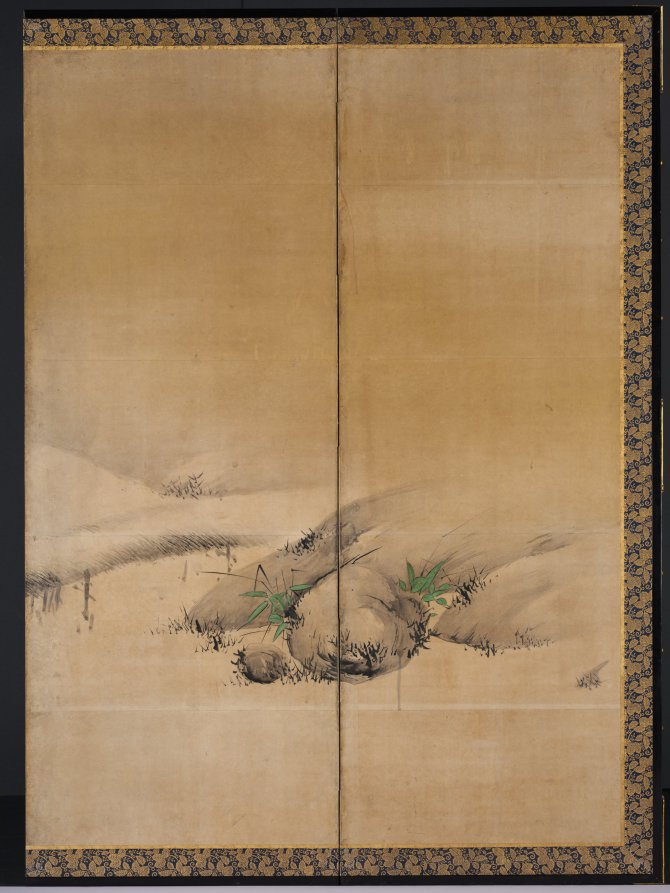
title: Winter and Summer Flowers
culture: Japan, Momoyama period (1573–1615)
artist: Kaihō Yūshō (Japanese, 1533–1615)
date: c. 1600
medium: One of a pair of six-panel folding screens; ink, color, and gold on paper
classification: Painting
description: White camellias bloom behind a large pine in the right screen and blue morning glories creep through bamboo in the left screen of this composition. The mountains and bridge suggest a continuous landscape, but the paintings actually juxtapose flowers of winter and summer, with time progressing from right to left. Kaihō Yūshō painted similar landscapes for Zen temples in Kyoto.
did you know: The pine and bamboo are defined by ink wash, but the flowers take form through color within contour lines.